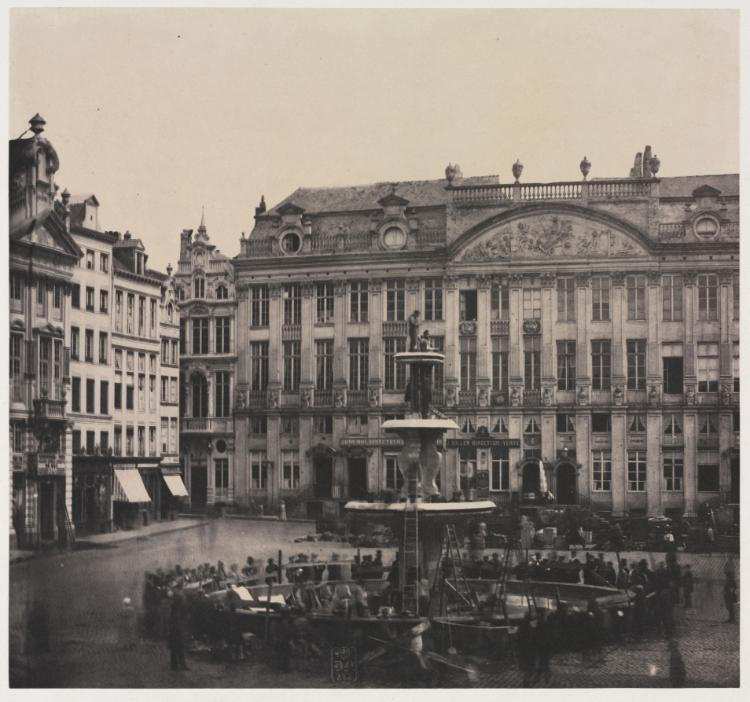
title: Untitled (Construction of Commemorative Fountain)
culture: Belgium, 19th century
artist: Louis Pierre Théophile Dubois de Nehaut (Belgian, 1799–1872)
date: July 1856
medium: salted paper print from wet collodion negative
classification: Photograph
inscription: Written in pencil on mount: "6"